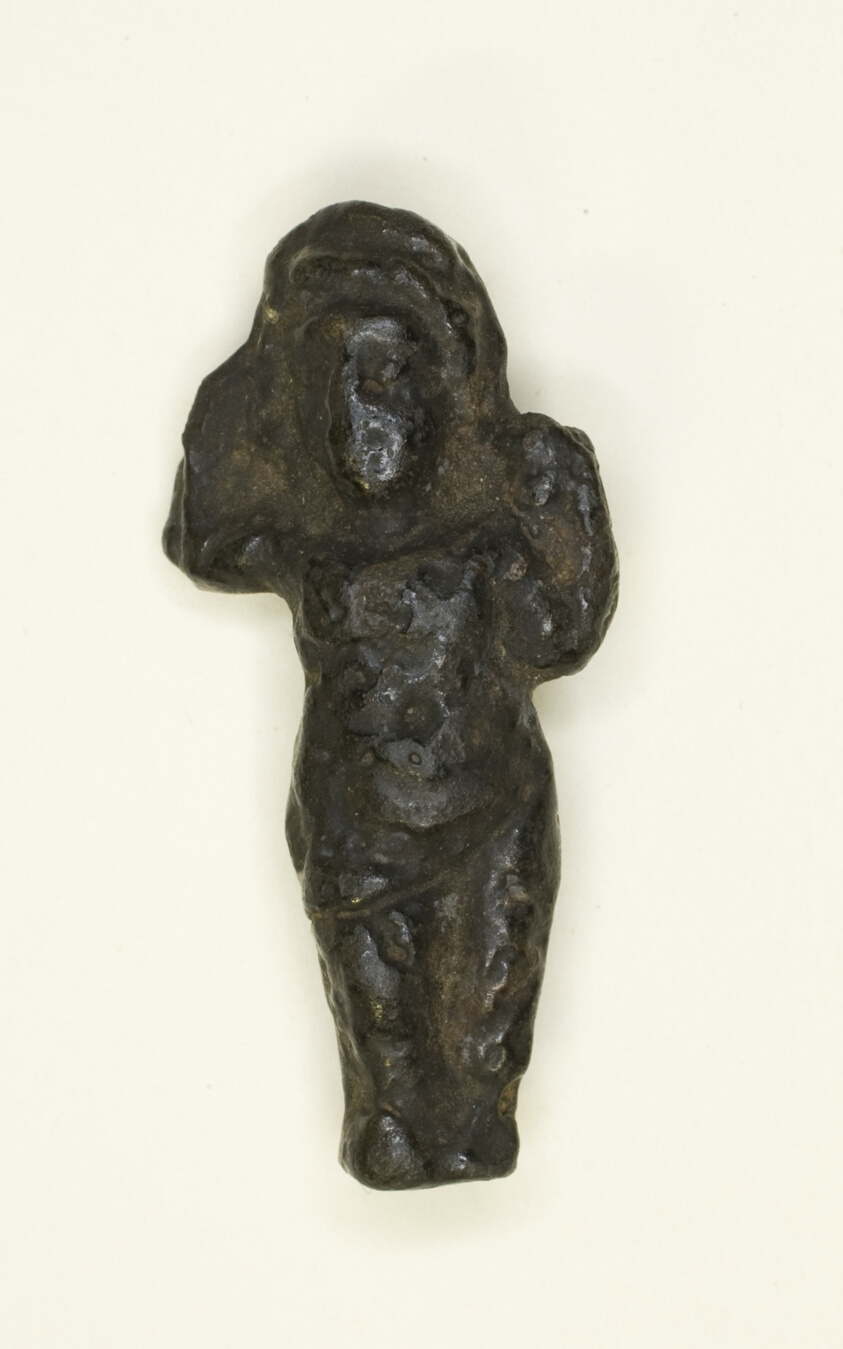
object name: Costume and Accessories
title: Amulet in the Shape of a Female Figure, possibly the Goddess Isis (?)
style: ptolemaic, greco-roman (egyptian)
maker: Egyptian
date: Roman Period (?) (30 BCE–395 CE)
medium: Steatite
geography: Egypt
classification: amulet; jewelry; earthenware; ceramics; sculpture; ancient art; costume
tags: goddesses